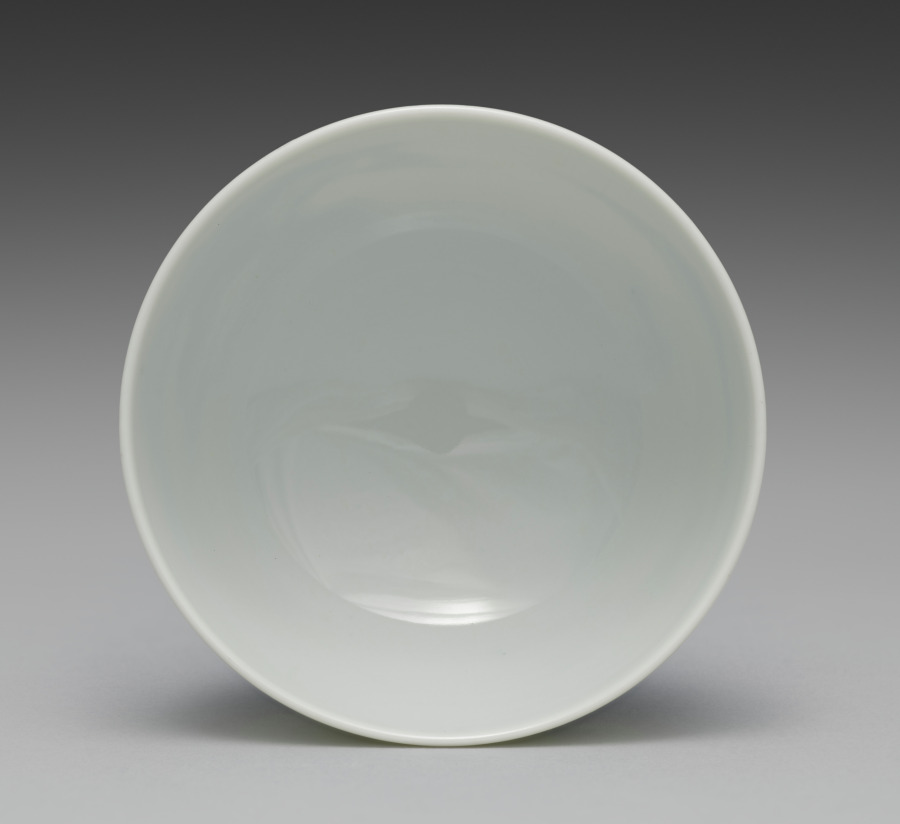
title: Teacup from Tea Set with Chinese Landscape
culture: Japan, Meiji period (1868–1912)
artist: Seifū Yohei III (Japanese, 1851–1914)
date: c. 1893–1914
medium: Porcelain with underglaze blue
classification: Ceramic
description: The theme of this sencha tea set is the Chinese scholar-recluse in an idyllic landscape. Each of the five teacups has a landscape with an architectural structure and some human activity. This tea set has a side-handled pot called a kyūsu, used for steeping, straining, and serving tea. Unlike some others, this set also has a yuzamashi, a container used to cool boiled water to just the right temperature for the best flavor when steeping. Seifū Yohei III’s painting teacher, Tanomura Chokunyū (1814–1907), made a visual record of famous sencha events that shows how these kinds of porcelains fit with objects such as a stove and kettle to form a complete set of utensils for tea preparation, and with ensembles of decorative objects meant to inspire creativity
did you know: A fourth cup shows a humbly dressed man with a broad-brimmed hat lugging a package tied to the end of a rod slung over his shoulder. In front of him is a two-story building flanked by deciduous trees and a man resting against the side of a sturdy stone bridge as he looks at a residence, or perhaps a set of roofed gates, further up the path.